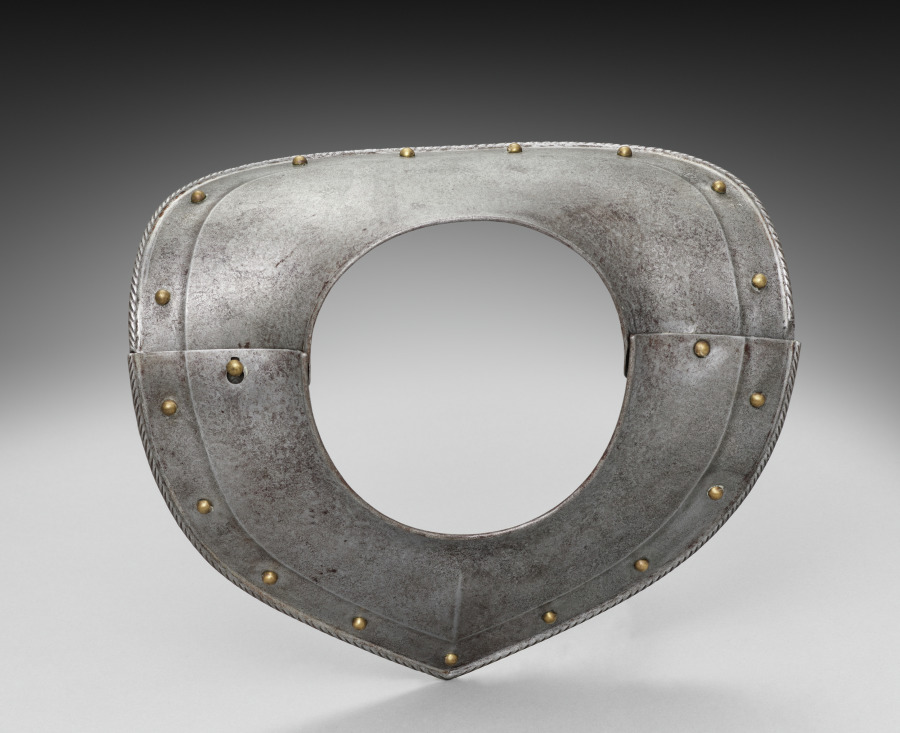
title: Colletin (two pieces)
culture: Germany, 19th century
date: 1801–1900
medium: steel with black paint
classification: Arms and Armor